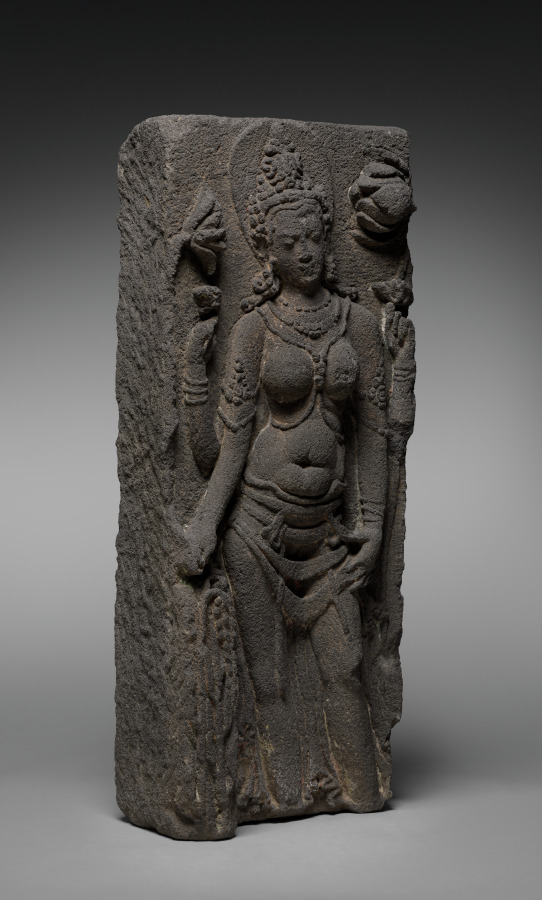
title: Goddess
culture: Indonesia, Central Java, Boyolali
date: 800s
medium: volcanic stone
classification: Sculpture